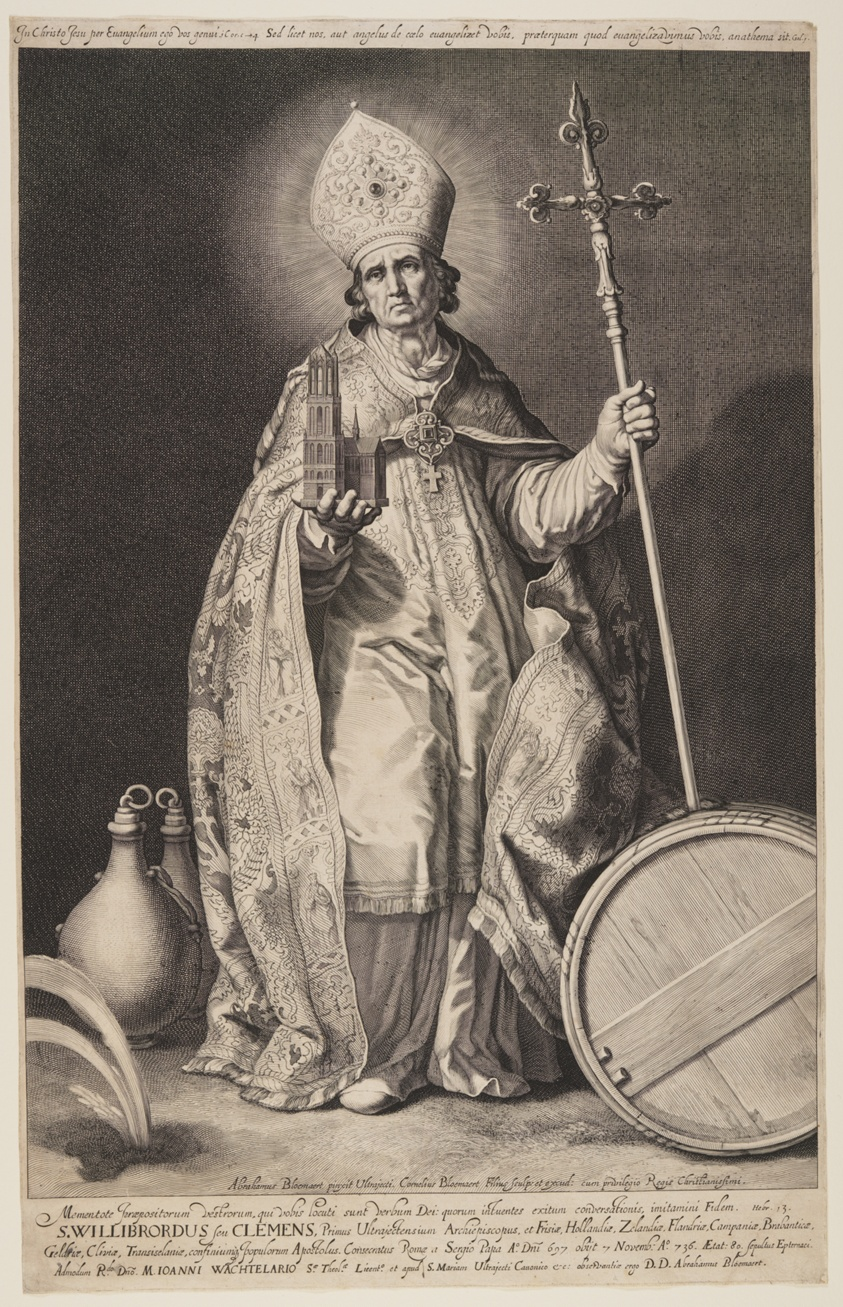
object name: Print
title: St Willibrord, plate 2, from The Bishops of Utrecht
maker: Cornelis Bloemaert (Dutch, c. 1603–1692); after Abraham Bloemaert (Dutch, 1566–1651)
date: c. 1626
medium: Engraving on ivory laid paper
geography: Netherlands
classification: engraving; paper; print; prints and drawing